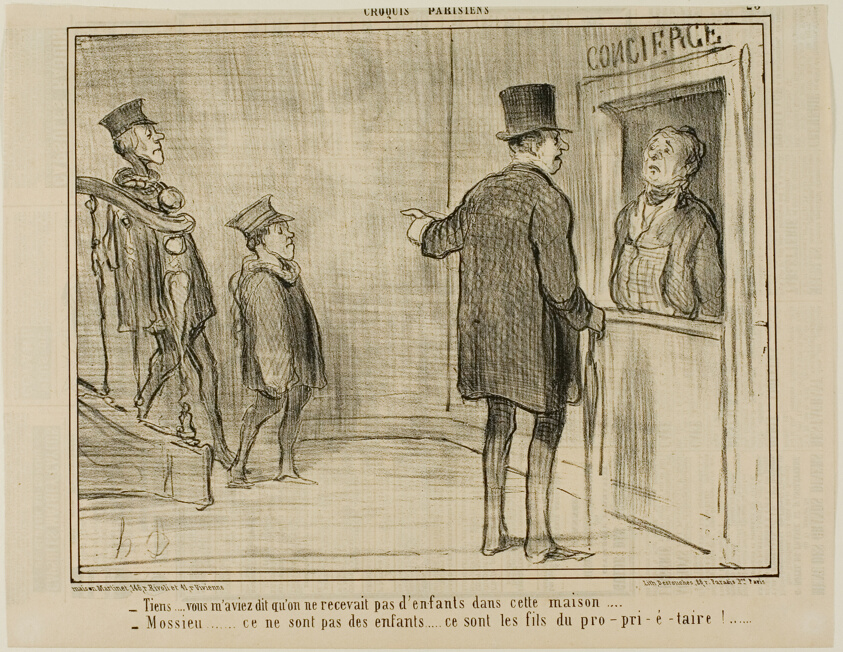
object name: Print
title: “- But you told me that children are not allowed in this house... - Sir, these are not children... they are the sons of the owner!...,” plate 23 from Croquis Parisiens, - par Daumier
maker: Honoré Victorin Daumier; French, 1808-1879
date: 1857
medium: Lithograph in black on buff wove paper, with letterpress verso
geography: France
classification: lithograph; print; prints and drawing